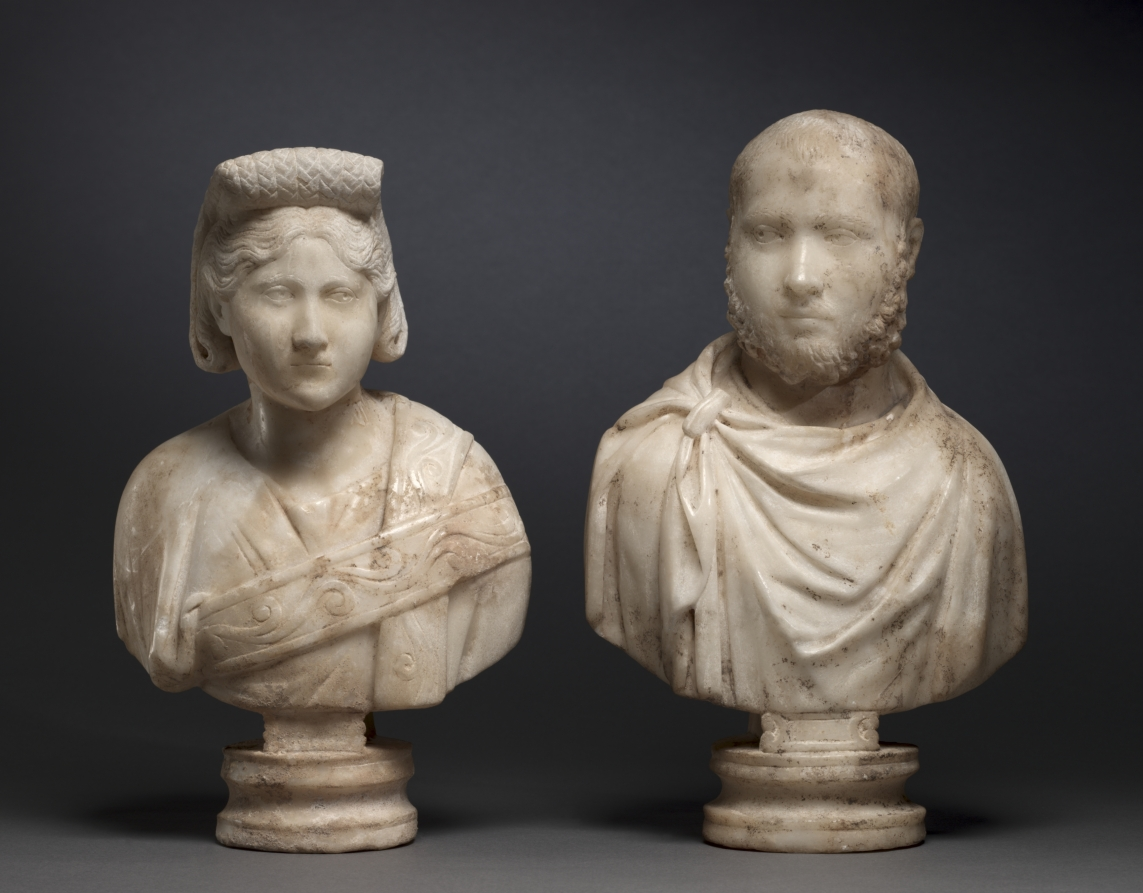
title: Portrait Bust of an Aristocratic Woman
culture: Anatolia, late Roman-early Christian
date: 280–90 CE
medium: marble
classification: Sculpture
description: These busts are thought to have been unearthed with the Good Shepherd and Jonah sculptures. The nearly identical facial characteristics of each sitter—three males and three females—suggest that the same man and woman was represented three times. Although the intended function of the busts remains unknown, they probably represent a husband and wife. The portraits have been dated stylistically, as well as by costume and hairstyle, to the AD 270s. One of the men wears a paludamentum, or fringed cloak. One of the women wears a decorative stole, an attribute of rank probably conferred on her by her husband. The most distinctive feature of the female portraits is the hairstyle, a variation of the scheitzelkopf, in which the hair, after being combed behind the ears down to the nape of the neck, is braided, pulled up over the top of the head and folded under at the front. Careful study of the evolution of women's coiffures supports a date of AD 270 to 280 for the portraits, about the same as the symbolic sculptures of Jonah and the Good Shepherd. The rarity of intentionally paired portrait busts in late antiquity, especially those in a series, raises questions as to their original function. The busts may have been commemorative and intended for distribution as diplomatic gifts. It is likely that they were commissioned by a single, important patron or family to enhance their social or political status.